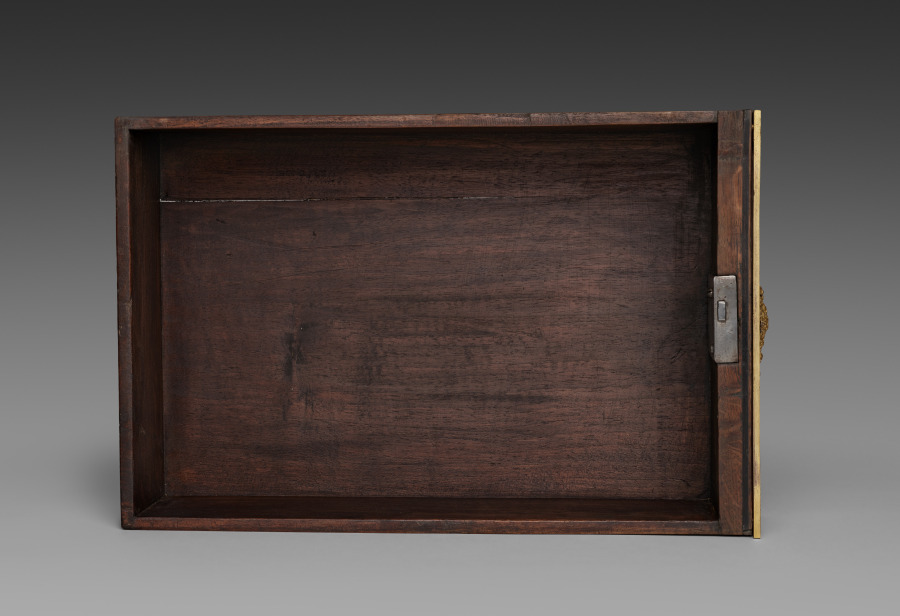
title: Side Drawer for Cabinet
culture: France, late 17th Century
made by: André-Charles Boulle (French, 1642–1732)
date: c. 1690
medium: ebony, marquetry in metal and tortoise shell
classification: Furniture and woodwork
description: Appointed cabinetmaker to King Louis XIV in 1672, André-Charles Boulle became a master of furniture making in France during the late 1600s until his death in 1732. Known primarily for his use of marquetry, in which metal patterns are inlaid into tortoiseshell then applied within the veneered surface of the furniture, Boulle established a level of quality and craftsmanship few others could achieve. As a result, his work found favor at the royal court and among other aristocrats and diplomats eager to impress the king. The inclusion of a medallion depicting Louis XIV within the bronze decoration of this chest would have identified the owner with the royal court. Often exhibiting stout architectural proportions with elegant groups of inlaid motifs such as the parrot on the central panel of this chest, Boulle’s designs are an example of the intellectual fashion for contrasting ideas, materials, and motifs.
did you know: Originally designed to sit atop an elaborate tall stand, this chest was likely altered in the late 1700s to reduce its scale and height.